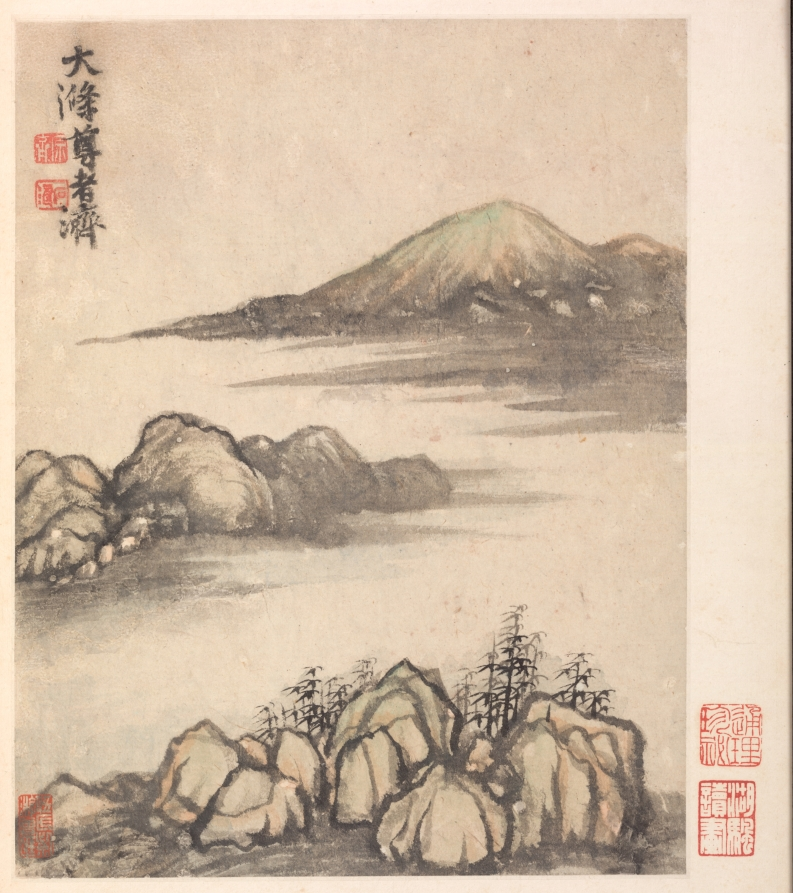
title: Reminiscences of Qinhuai River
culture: China, Qing dynasty (1644-1911)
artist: Shitao (Chinese, 1642–1707)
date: 1642–1707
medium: album leaf, ink and color on Song paper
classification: Painting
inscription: 大滌尊者濟 [印]原濟; 石濤